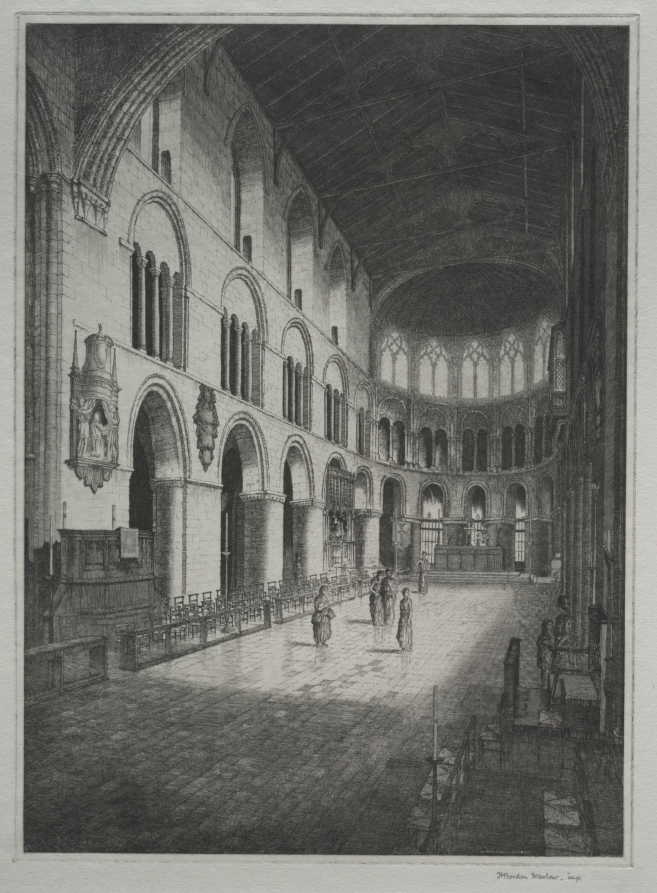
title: St. Bartholomew's Church, Interior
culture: England, 20th century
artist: Herbert Gordon Warlow (British, 1885–1942)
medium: drypoint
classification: Print